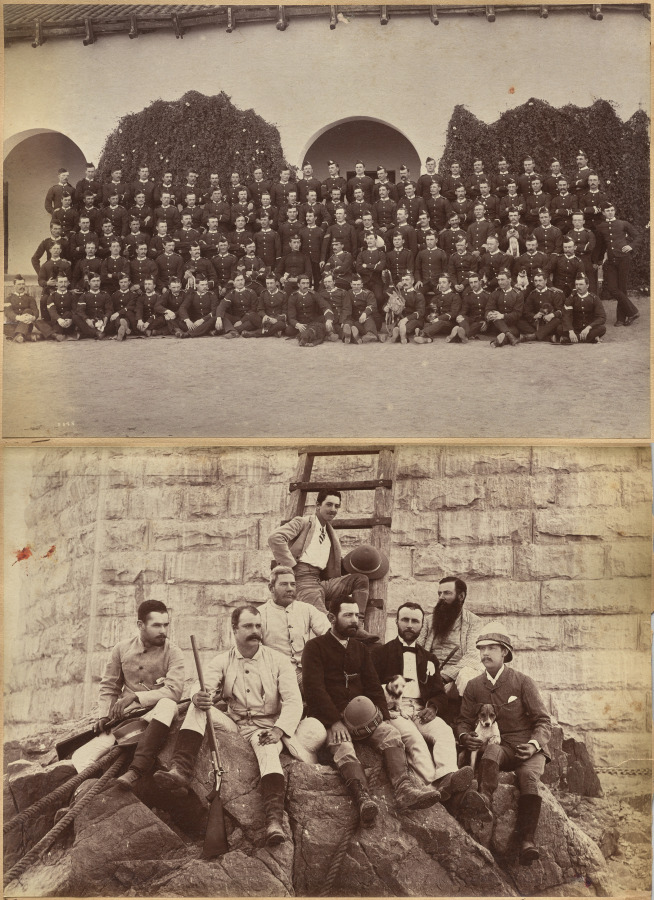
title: B. c/o Devonshire Regiment, Jhansi (recto); Staff of Messrs. Glover & Co., Sindh Bridge (verso)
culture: India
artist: Raja Deen Dayal (Indian, 1844–1905)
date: c. 1882–87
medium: albumen print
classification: Photograph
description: These photographs are part of an album, now disassembled, of around 105 photographs taken in India between 1885 and summer 1887 that provide glimpses into the lives of the British colonial elite and royal and upper-class Indians. The museum holds another group of 37 pictures from this album (2016.266), which was probably commissioned by a British civil servant visiting or working in India around 1888 as a personal souvenir of his experiences there.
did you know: Raja Deen Dayal is regarded now, and was considered during his lifetime, to be India’s most important 19th-century photographer.